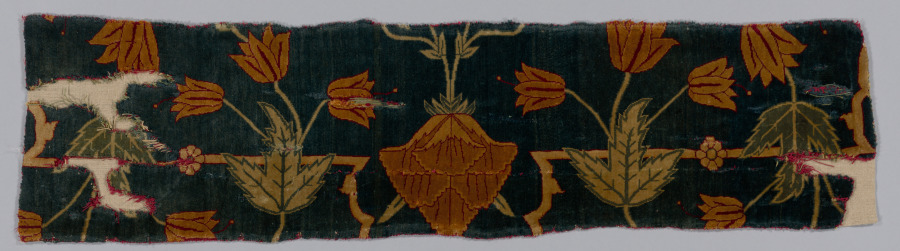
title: Fragments of a Carpet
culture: India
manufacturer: Imperial Manufactory (Indian)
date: 1600–1650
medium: silk and wool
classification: Carpet